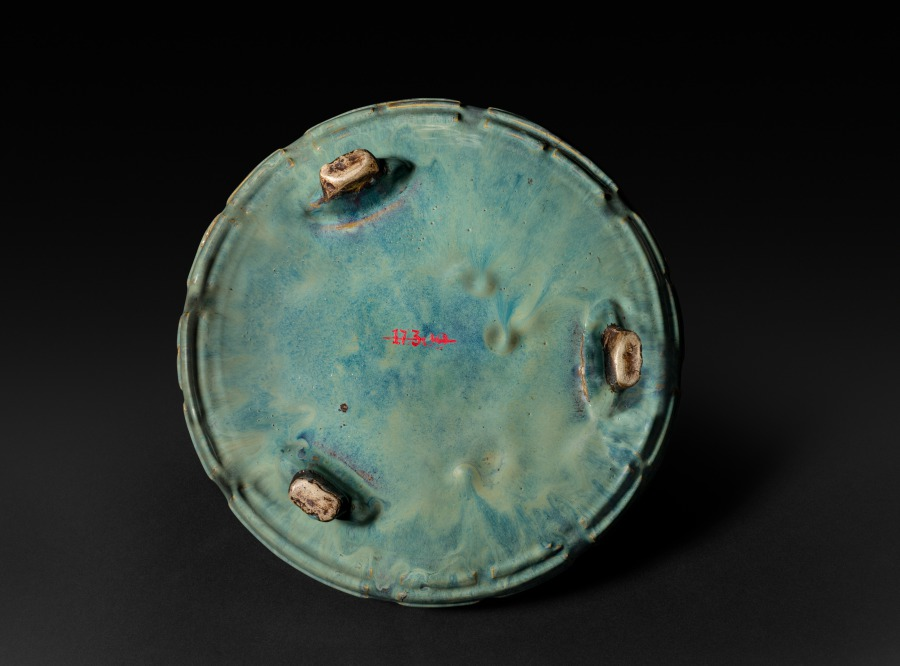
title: Tripod Bulb Dish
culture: China, Ming dynasty (1368–1644)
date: 1368–1644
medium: porcelain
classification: Ceramic